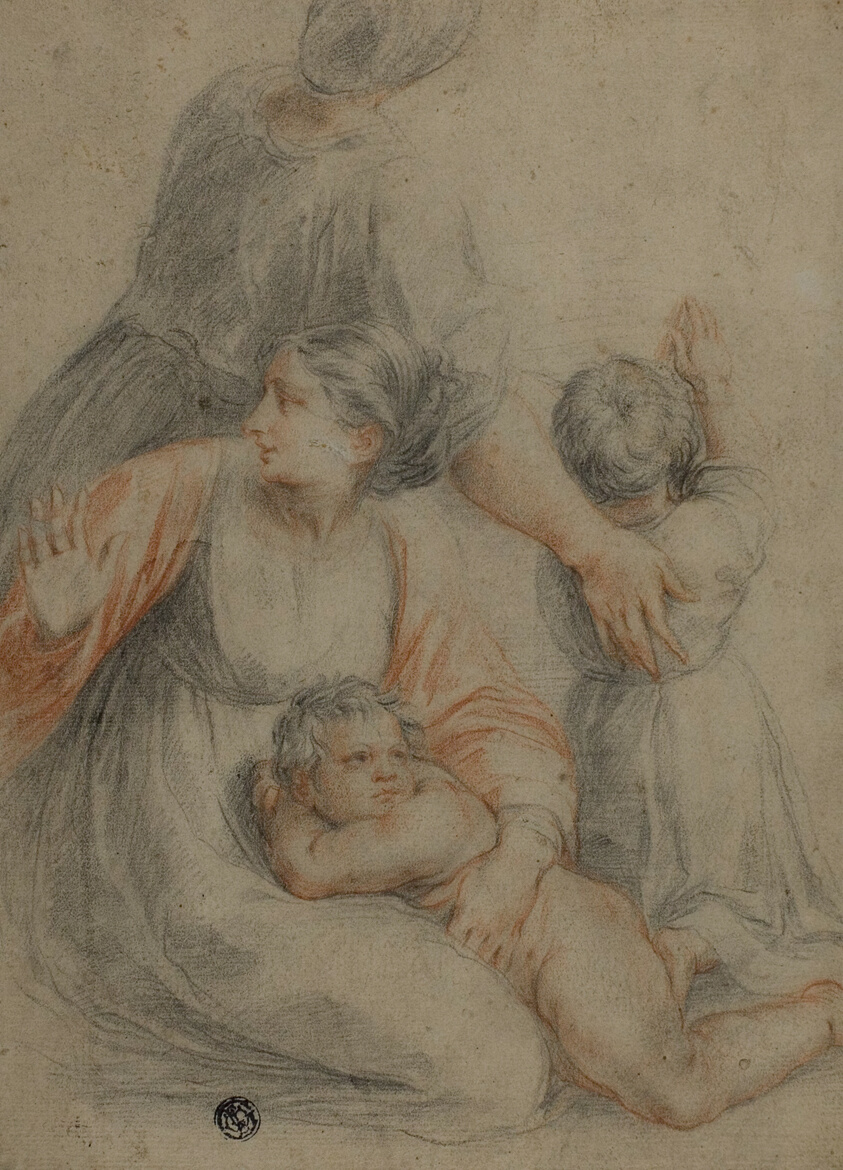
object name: Drawing and Watercolor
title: Woman and Children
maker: After Raffaello Sanzio, called Raphael; Italian, 1483-1520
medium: Red and black chalk on tan laid paper, laid down on ivory laid board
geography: Italy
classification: chalk; drawings (visual works); prints and drawing